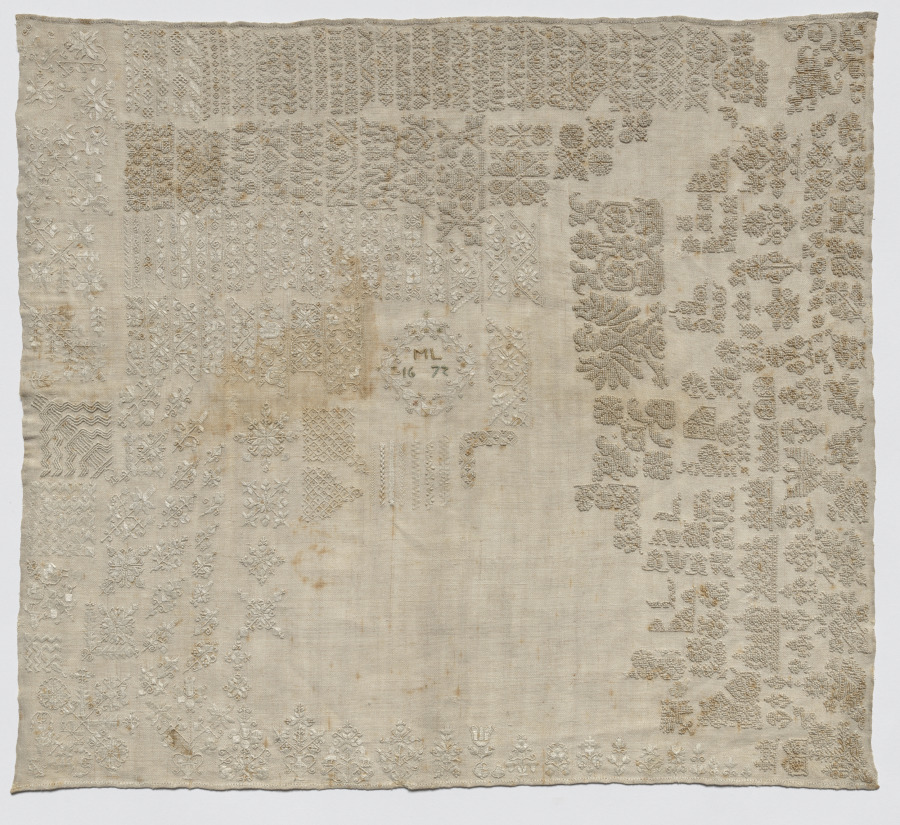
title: Sampler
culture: Italy, 17th century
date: 1672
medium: embroidery: linen thread on linen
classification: Sampler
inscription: enclosed in wreath: "ML / 1672."